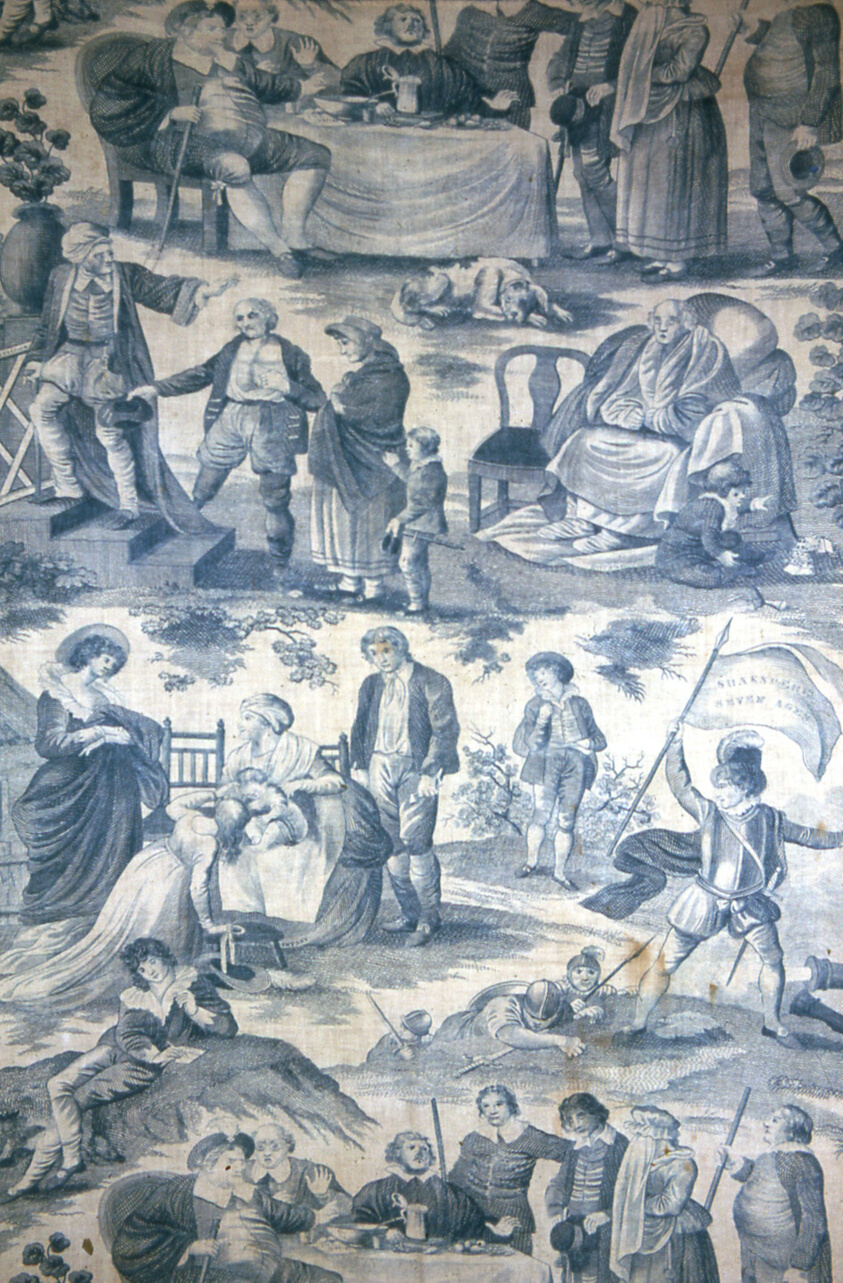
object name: Textile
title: Shakespeare's Seven Ages (of Man) (Furnishing Fabric)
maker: Engraved by John Slack (English, active 1794-1828) and others after paintings by Robert Smirke's (English, 1752–1845); Salford, Lancashire, England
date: c. 1805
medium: Cotton, plain weave; copperplate printed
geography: England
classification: textile; weaving - printed; furnishing textile